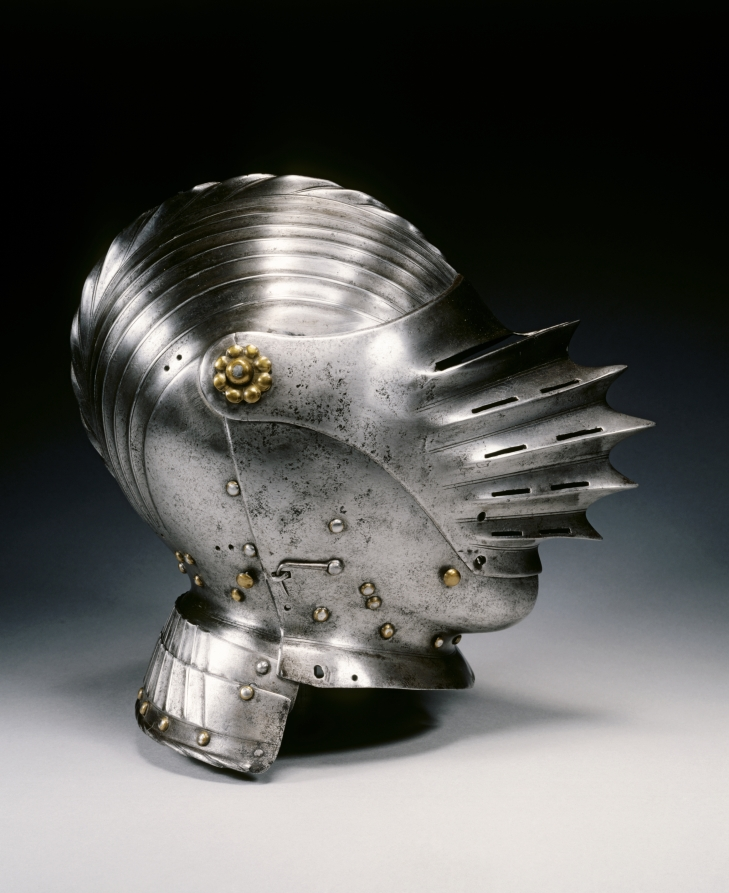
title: Close Helmet in Maximilian Style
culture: Germany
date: c. 1520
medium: steel and brass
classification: Arms and Armor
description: The regular fluting of this helmet is a style known as "Maximilian," named after Maximilian I, Holy Roman Emperor (1493–1519). Besides being decorative the fluting is a strengthening device that works similar to corrugated metal. This decoration would have been costly as it was time consuming to produce and required precise work. It would have only been available to the wealthiest of clients.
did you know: Known as the "Last Knight," Maximilian played a prominent role in this history of armor by building up the armament industry and fostering the modernization of the armorer's craft.